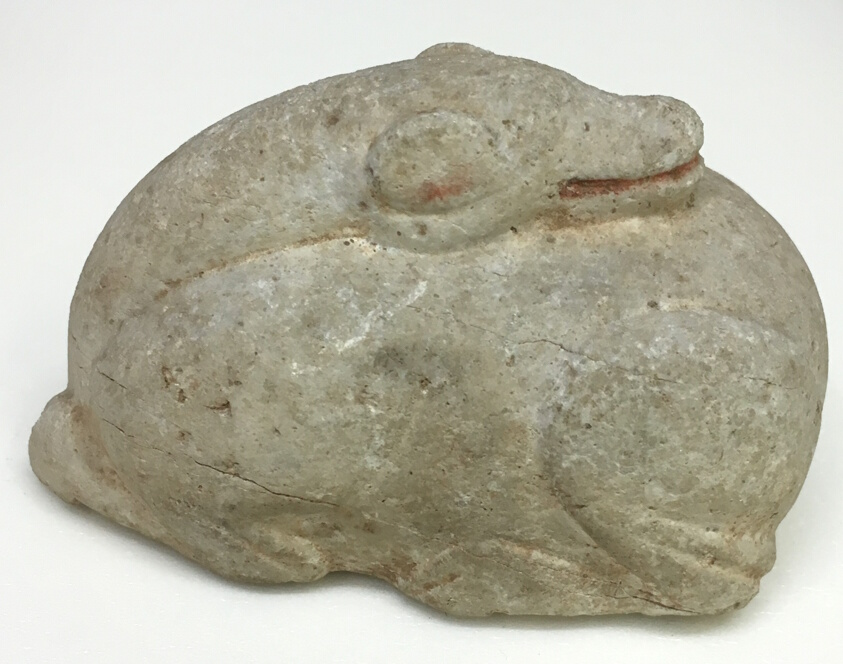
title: Deer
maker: China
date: Han Dynasty (206 BCE–220 CE)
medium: Bronze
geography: China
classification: stone (unidentified); stone; sculpture; asian art